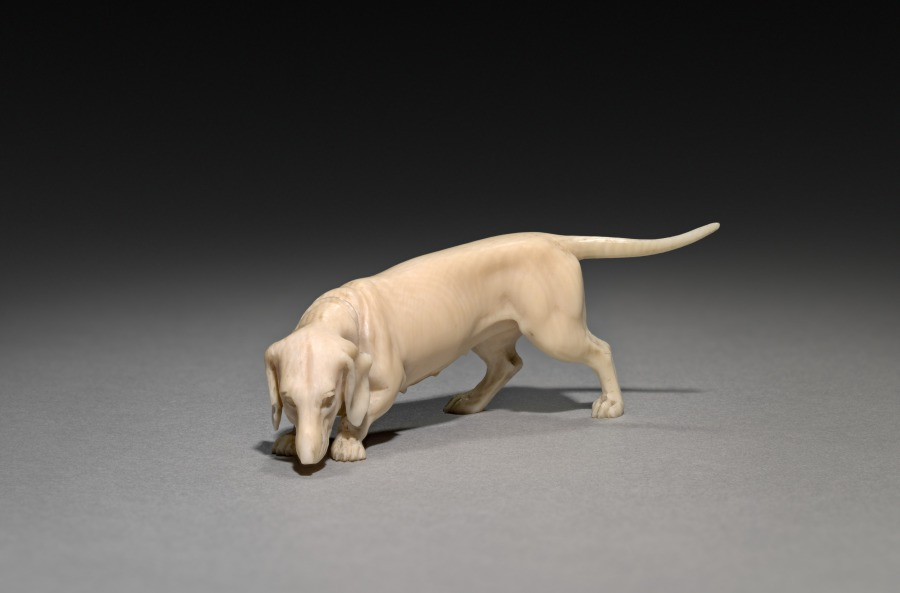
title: Dachsund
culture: Japan, Meiji period (1868–1912)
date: early 1900s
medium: ivory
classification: Ivory